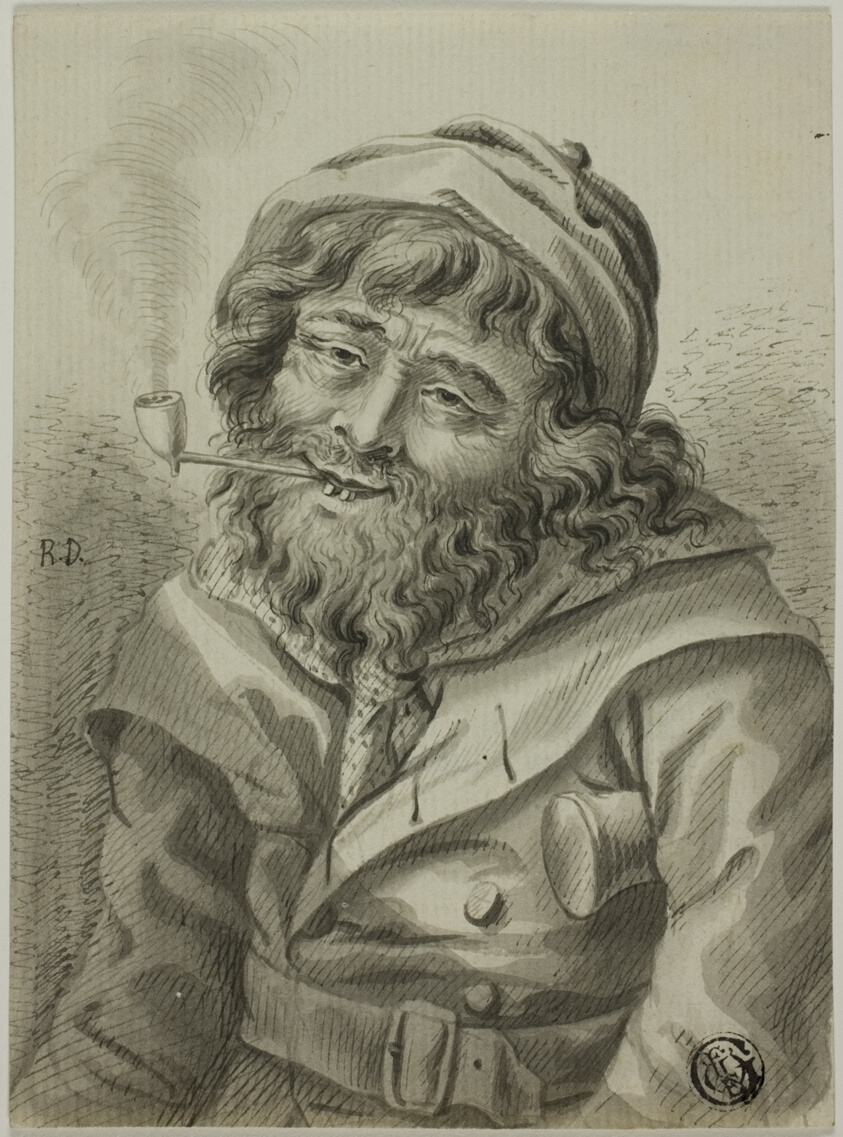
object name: Drawing and Watercolor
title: Smoking Sea Captain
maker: Unknown Artist; British, 18th century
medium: Pen and black ink, with brush and gray wash, on ivory laid paper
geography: United Kingdom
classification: pen and ink drawings; drawings (visual works); prints and drawing